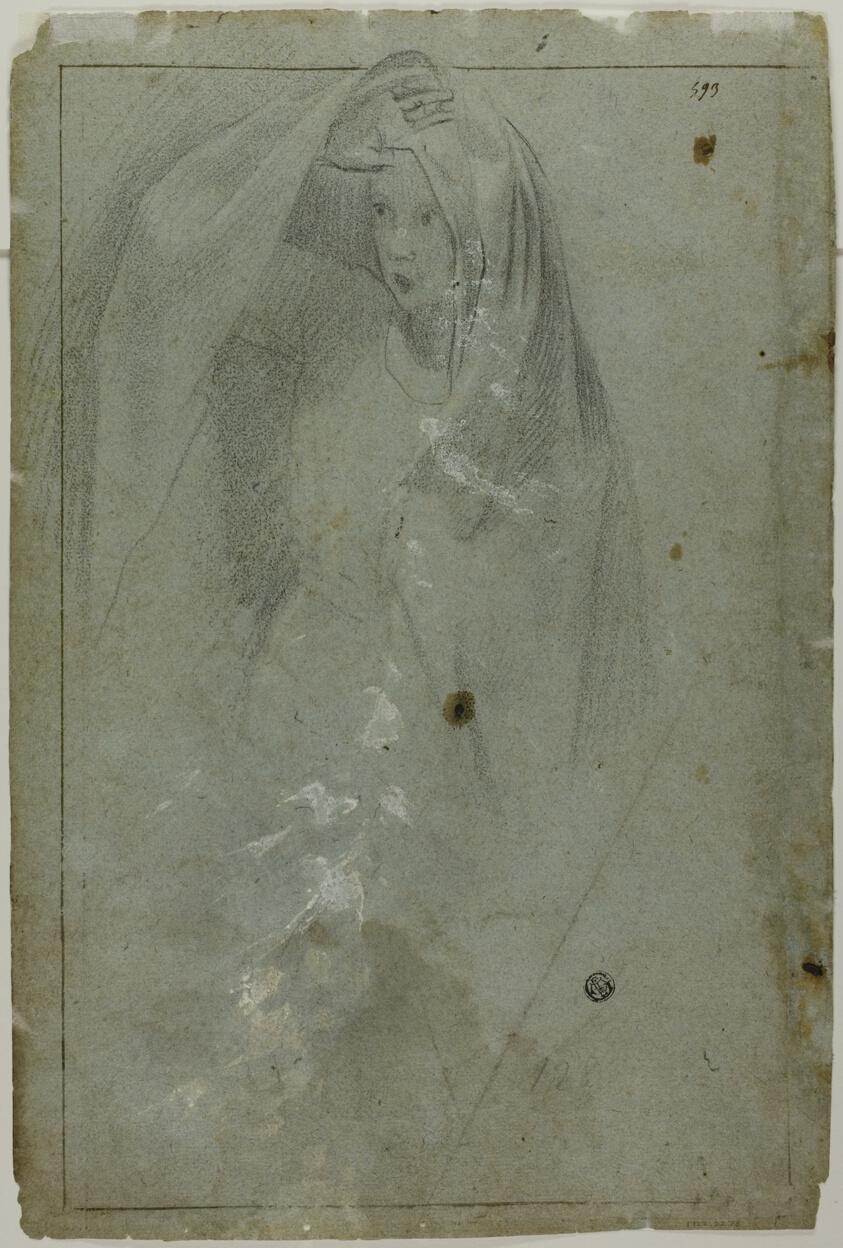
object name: Drawing and Watercolor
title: David Beheading Goliath (recto); Sketch of Draped Female Figure with Right Arm Raised Above Head (verso)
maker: Probably Domenico Fiasella (Italian, 1589-1669); or possibly Lodovico Carracci (Italian, 1555-1619)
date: n.d. (recto); c. 1621 (verso)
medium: Black chalk, heightened with white chalk (recto and verso), on blue laid paper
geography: Italy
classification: drawings (visual works); prints and drawing